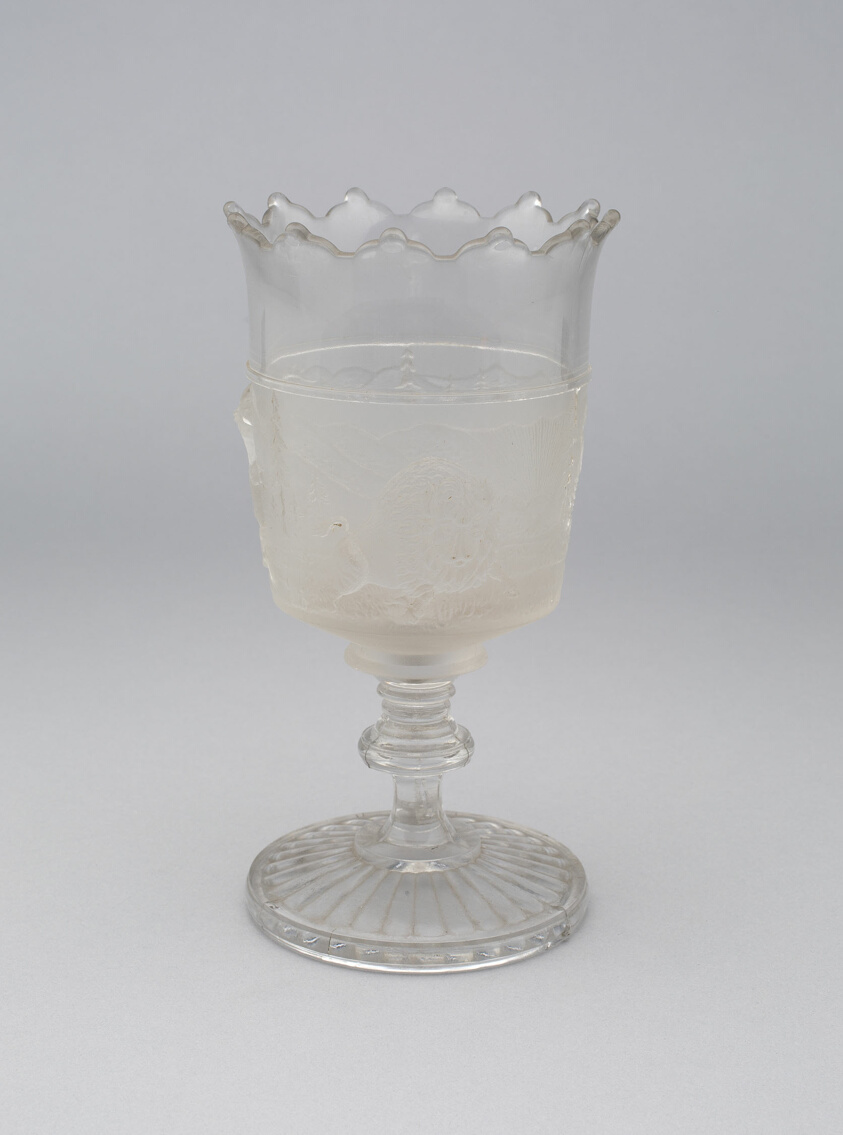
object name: Glass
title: "Westward Ho!/Pioneer" pattern goblet on pedestal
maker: Gillinder and Sons, 1861–c. 1930; Philadelphia or Greenbsburg, Pennsylvania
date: c. 1876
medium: Glass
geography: Philadelphia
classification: drinking vessel; glass; american decorative arts; american arts; decorative arts